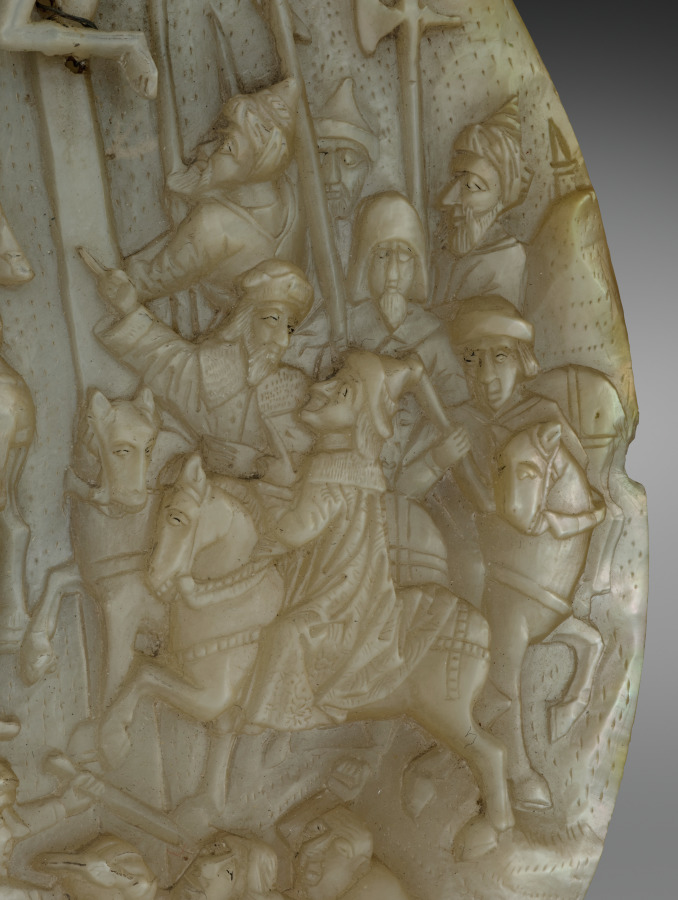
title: Calvary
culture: Germany, Middle Rhine?, 15th century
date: c. 1450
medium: mother-of-pearl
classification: Sculpture